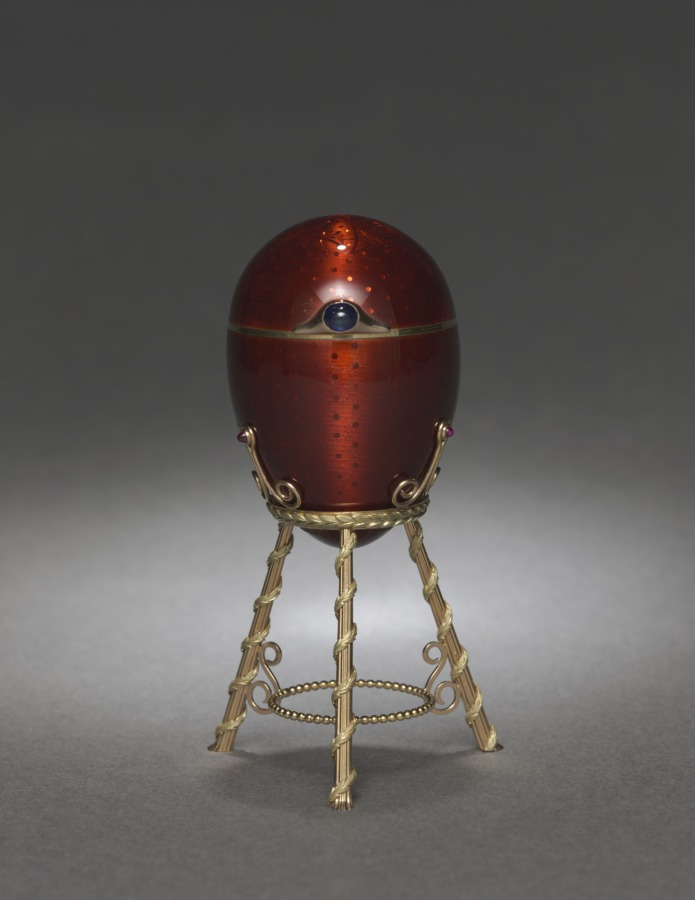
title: Egg on Stand with Easel and Photograph of Tsarevich Alexei Nikolaievich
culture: Russia, St. Petersburg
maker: Alexander Edward Tillander (Russian, 1837–1918)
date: c. 1890–1896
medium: gold, enamel, sapphire, gold easel and stand, paper, faceted green glass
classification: Miscellaneous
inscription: engraved beneath the enamel of the top are the Cyrillic letters "XB" [in monogram] which signify the phrase, "Christ is risen."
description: In the Russian Orthodox religious tradition, eggs are offered as Easter gifts to symbolize rebirth, renewal, and the resurrection of Christ. This jeweled Russian egg is engraved with XB symbolizing the phrase, “Christ is risen,” and would have been given to a lady in a wealthy household, perhaps someone of high rank within the imperial court, given the richness of materials.